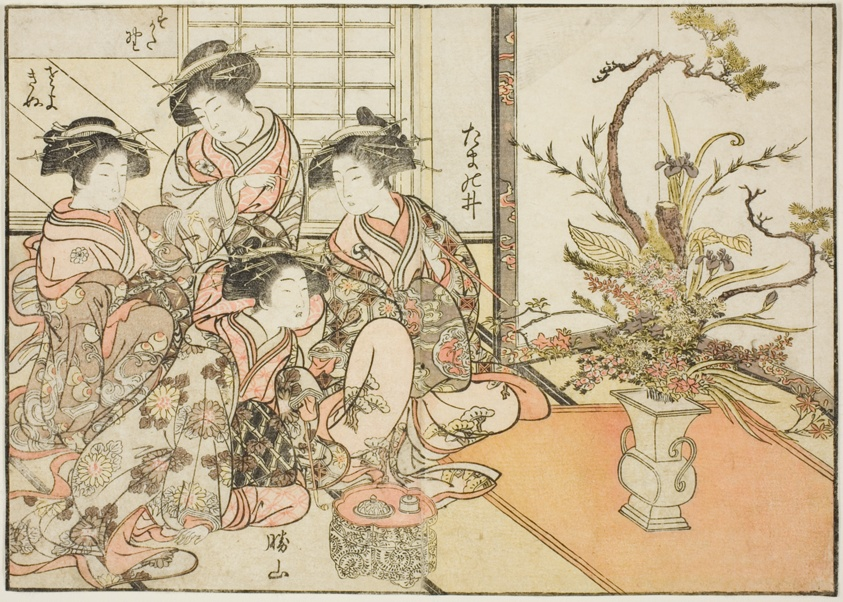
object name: Print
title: Courtesans of Yotsumaya, from the book "Mirror of Beautiful Women of the Pleasure Quarters (Seiro bijin awase sugata kagami)," vol. 2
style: Japanese (culture or style)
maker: Katsukawa Shunsho; Japanese, 1726-1792; Kitao Shigemasa; Japanese, 1739-1820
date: 1776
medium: Color woodblock print; double-page illustration cut from a book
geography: Japan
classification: woodblock print; print; asian art